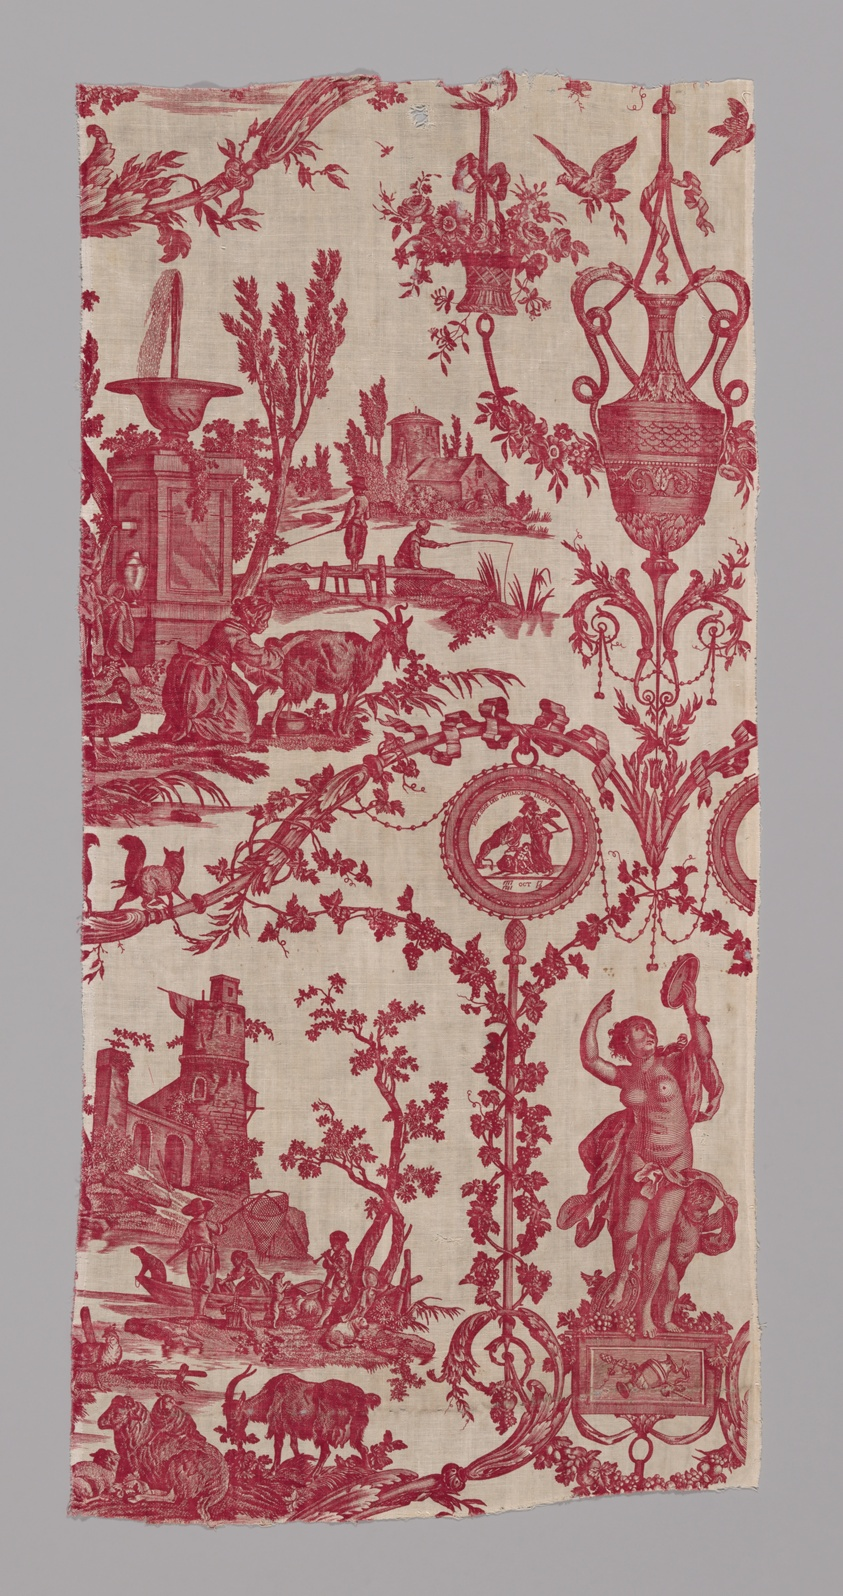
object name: Textile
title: La Liberté Americaine (American Liberty) (Furnishing Fabric)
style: jouy-en-Josas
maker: Designed by Jean Baptiste Huet (French, 1745–1811) after medallions engraved by Augustin Dupré (French, 1748–1833) after others; Manufactured by Christophe-Philippe Oberkampf (naturalized French, 1738-1815), Oberkampf Manufactory (French, 1760-1843); Jouy-en-Josas, France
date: 1783/89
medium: Cotton, plain weave; copperplate printed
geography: Jouy-en-Josas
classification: weaving - printed; textile; furnishing textile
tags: medallions, animals, white (color), vines, red (color), France, propaganda